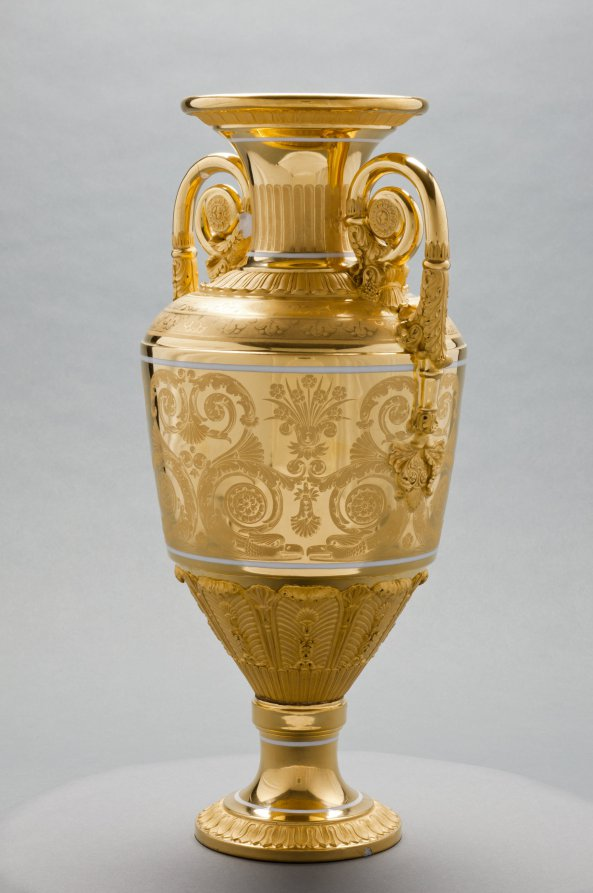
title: Vase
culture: Russia, St. Petersburg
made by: St. Petersburg Imperial Porcelain Factory (Russian)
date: c. 1820–1830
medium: gilt porcelain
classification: Ceramic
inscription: inscribed: "Moreau" in gold near lip.